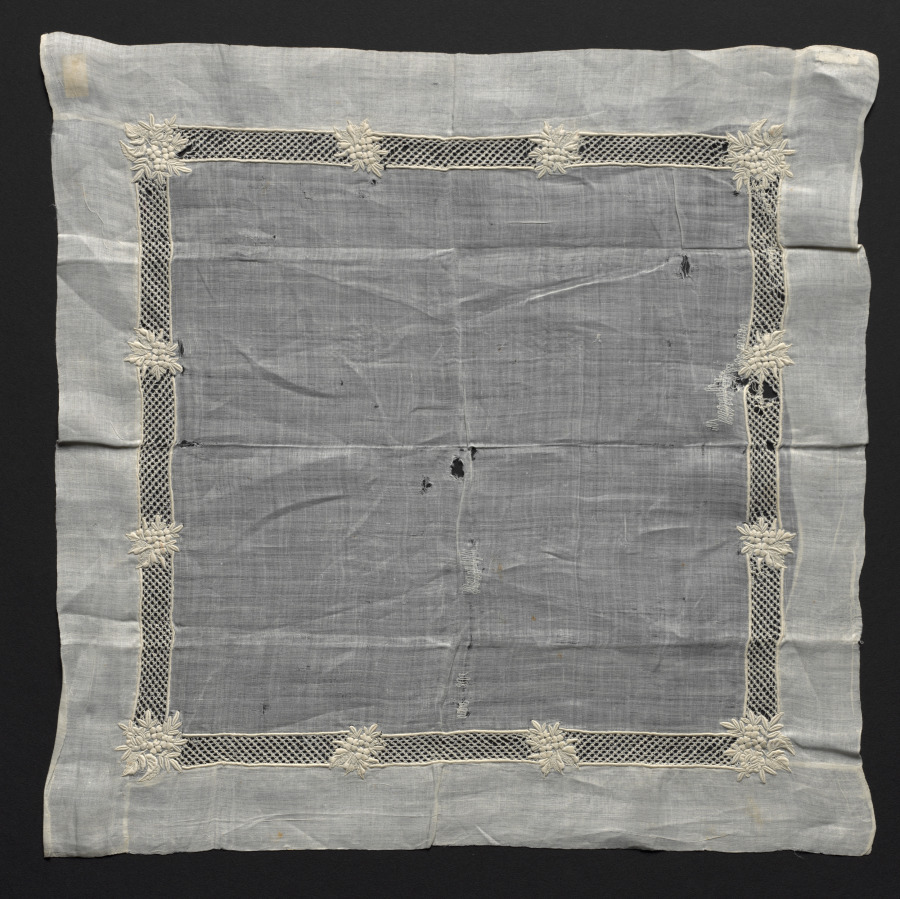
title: Lace Handkerchief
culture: France or Switzerland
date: 1800s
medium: Plain weave linen: needle lace (drawnwork) and embroidery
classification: Embroidery